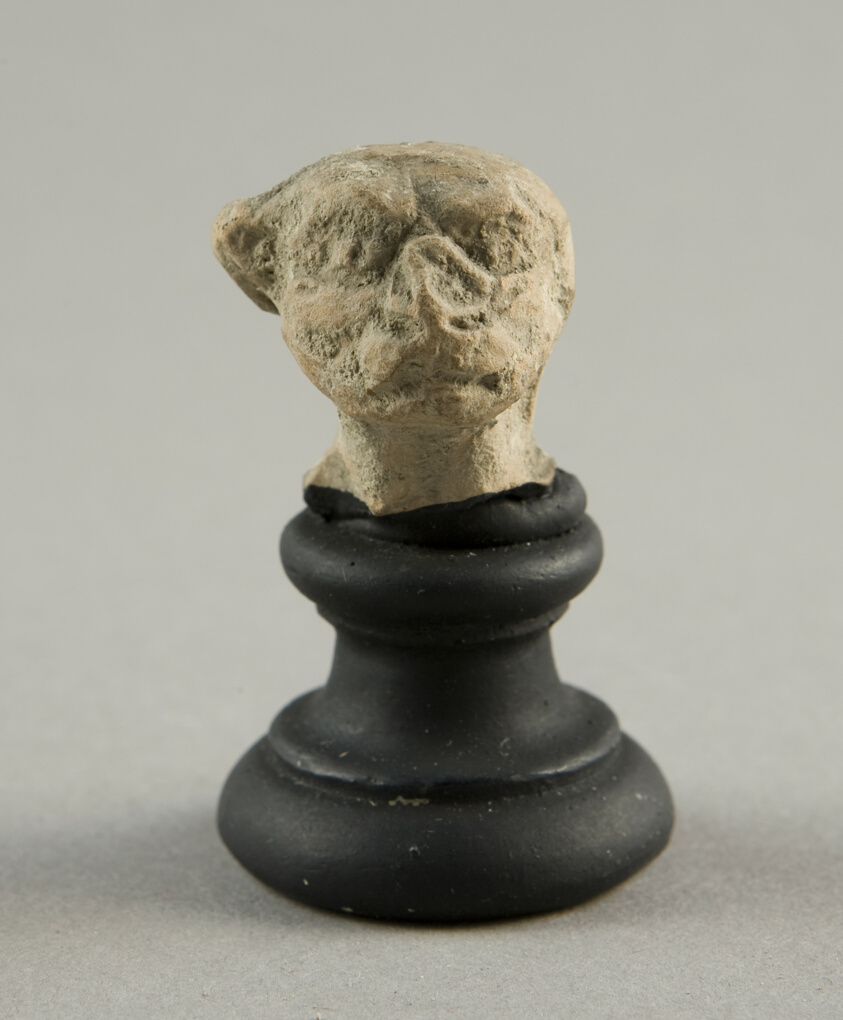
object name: Sculpture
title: Head with Simian Features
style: greek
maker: Greek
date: 2nd-1st century BCE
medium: terracotta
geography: Greece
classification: earthenware; ceramics; sculpture; ancient art